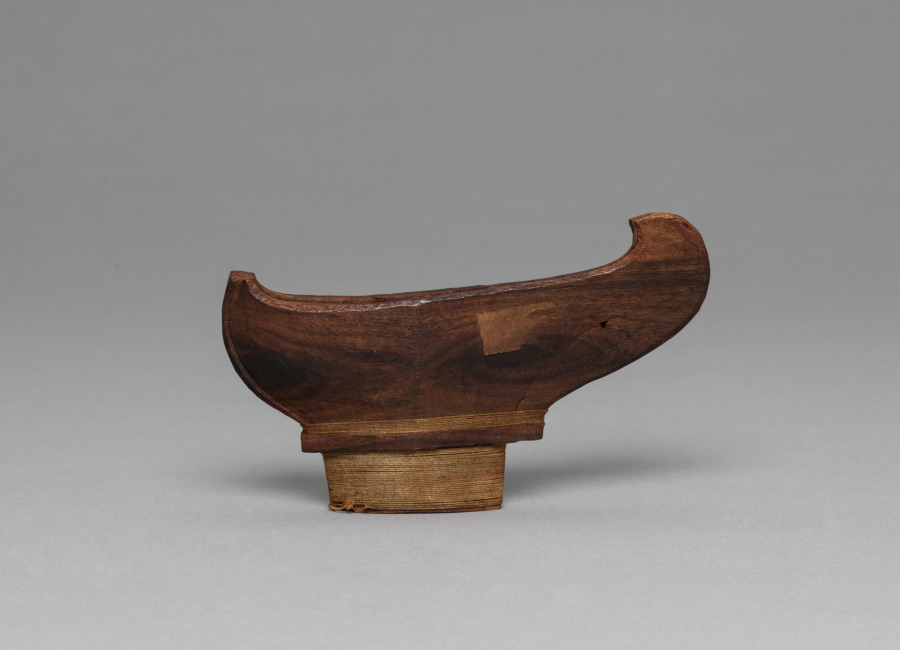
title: Scabbard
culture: Philippines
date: before 1916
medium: Wood with thread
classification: Arms and Armor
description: This is the upper section of a kalis scabbard, carved from a single block of hardwood. The carved walls follow the classic okir-inflected contouring, though the decoration is restrained. A single vertical motif—likely a simplified dapun (leaf) element—is incised along the center line, with the rest of the surface left plain.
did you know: The scabbard’s minimalism suggests either an earlier form or a piece intended for practical use.